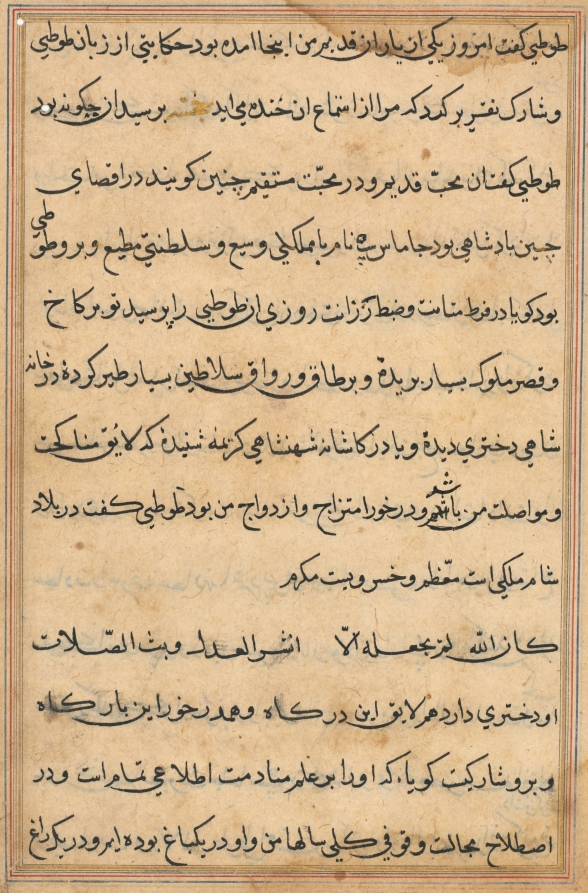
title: Page from Tales of a Parrot (Tuti-nama): text page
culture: Mughal India, court of Akbar (reigned 1556–1605)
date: c. 1560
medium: gum tempera, ink, and gold on paper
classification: Painting